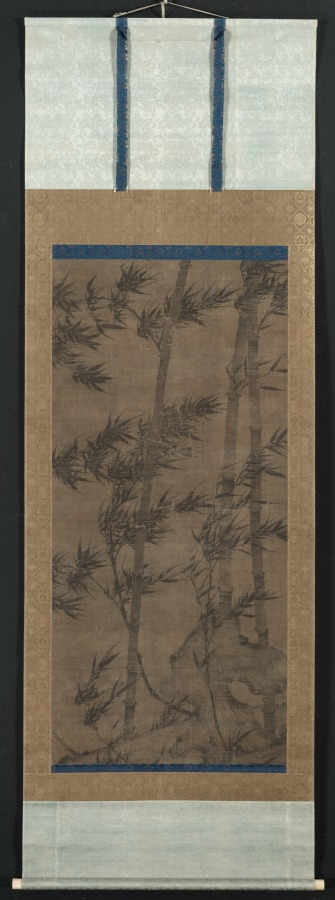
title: Bamboo in Four Seasons: Summer and Winter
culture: China, Yuan dynasty (1271-1368)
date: 1279–1368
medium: Pair of hanging scrolls; ink on silk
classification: Painting